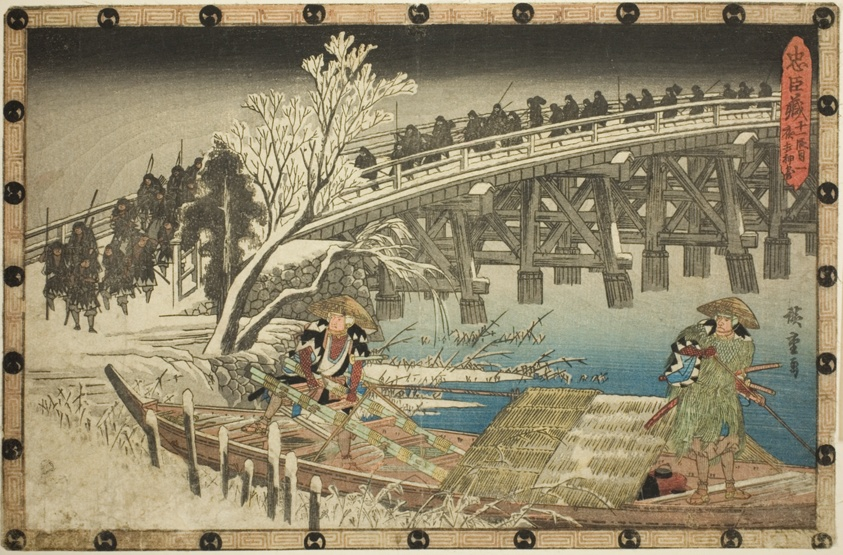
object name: Print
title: Act 11, Part 1: The Approach to the Night Attack (Juichidanme ichi, yochi oshiyose), from the series "The Revenge of the Loyal Retainers (Chushingura)"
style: Japanese (culture or style)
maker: Utagawa Hiroshige 歌川 広重; Japanese, 1797–1858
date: c. 1834/39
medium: Color woodblock print; oban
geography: Japan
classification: woodblock print; print; asian art